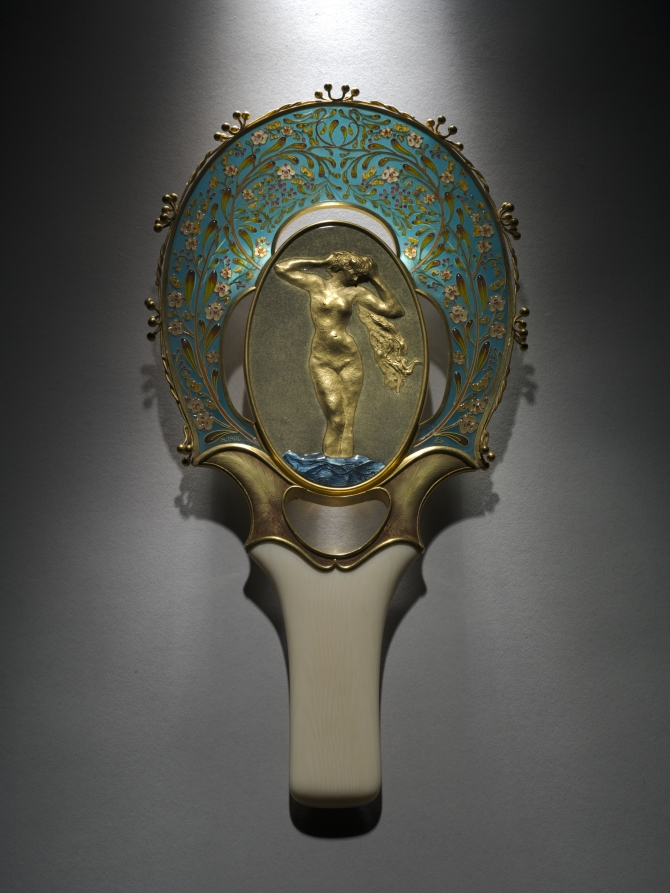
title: Hand Mirror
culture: France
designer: Félix Bracquemond (French, 1833–1914)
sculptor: Auguste Rodin (French, 1840–1917)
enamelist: Alexander Riquet (French)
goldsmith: Alexis Falize (French, 1811–1898)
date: c. 1900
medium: gold, enamel, and ivory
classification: Miscellaneous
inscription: cipher engraved on inside top of handle: "VITTA" (in monogram form)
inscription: Cast at bottom of relief: A Rod - -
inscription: on the plique-a-jour enamel, the date and mark of Bracquemond and "AR," the monogram for Alexandre Riquet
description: We often think of art as the work of just one person. In the case of this mirror, its harmonious appearance conceals the number of people involved in its creation. The designer Félix Bracquemond was commissioned by wealthy banker Baron Joseph Vitta to create decorative objects for his multiple homes. Bracquemond worked with other artists in making this mirror: well-known sculptor Auguste Rodin created the figure of Venus; artisan Alexandre Riquet fashioned the elaborate enameled decoration; and goldsmiths from Parisian jewelers Falize Frères completed the mirror and its blue translucent frame embedded with yellow, pink, and white flowers. Through close collaboration between patron, designer, and artists, this mirror represents the trend at the end of the 1800s for blending artistic specialties to create a single work of art. The CMA’s collection includes Bracquemond’s preparatory drawings for the mirror and Rodin’s carved plaster model for the figure of Venus.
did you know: The mirror’s relief of Venus may be the only example of Rodin providing an ornament for a small decorative object.